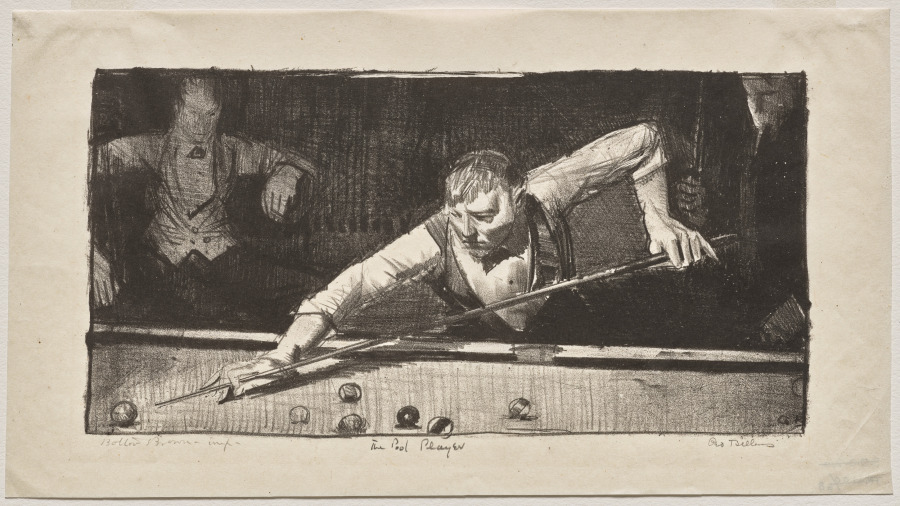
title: The Pool Player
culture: America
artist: George Bellows (American, 1882–1925)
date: 1921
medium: lithograph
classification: Print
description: A single overhead light illuminates the pool player’s careful concentration and agile pose while casting two rapt companions in shadow. The figure on the left is believed to be Bellows’s self-portrait.